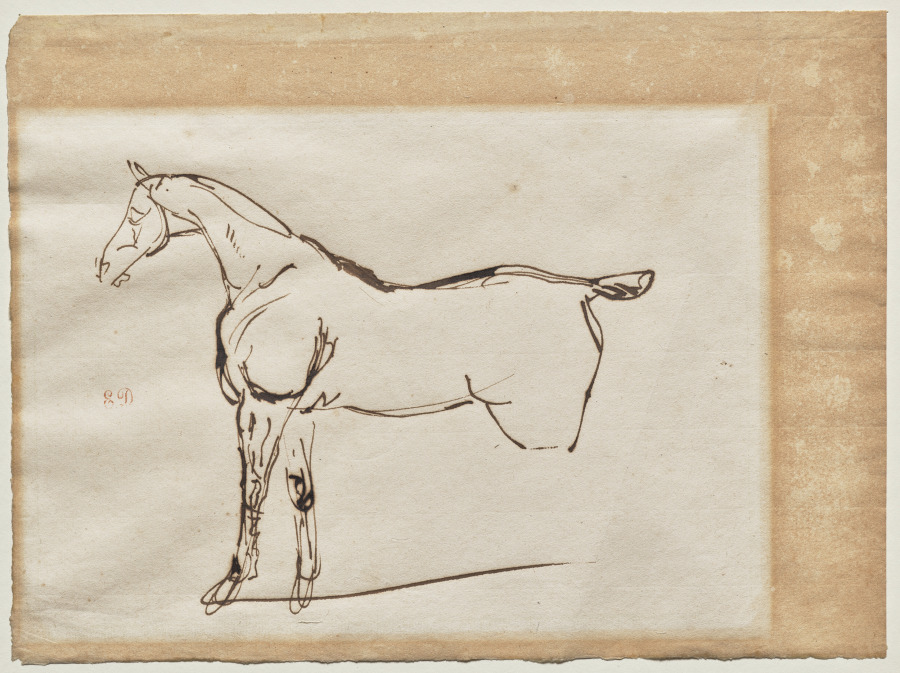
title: Study of a Horse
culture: France, 19th century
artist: Eugène Delacroix (French, 1798–1863)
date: c. 1825–30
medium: Pen and brown ink on cream laid paper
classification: Drawing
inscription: stamped, in red ink, at center left: E.D. [Lugt 838a]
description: Eugène Delacroix repeatedly depicted horses throughout his career, visiting stables to observe the animals at rest and in motion. This sheet is likely one such example made from life. Delacroix loosely sketched the horse's form, concentrating on the tension of its front legs and leaving the rest of its body loosely rendered. Through such exercises, the artist hoped to eventually master this subject.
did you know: Although Eugène Delacroix created a realistic representation of a horse in this drawing, the animals sometimes served as symbols for the conflict between man and nature in his work.